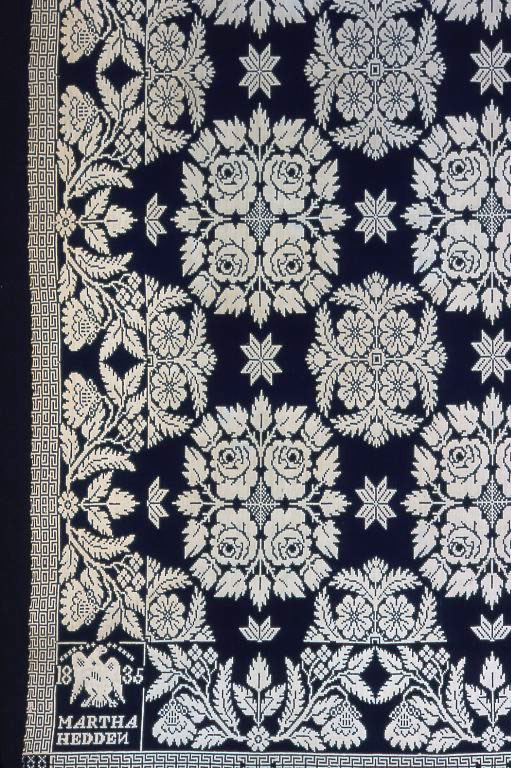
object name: Textile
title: Coverlet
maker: United States, New York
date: 1835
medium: Cotton and wool, plain weave double cloth; woven on loom with Jacquard attachment; two loom widths joined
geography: United States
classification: textile; coverlet; weaving - coverlet; weaving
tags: coverlet